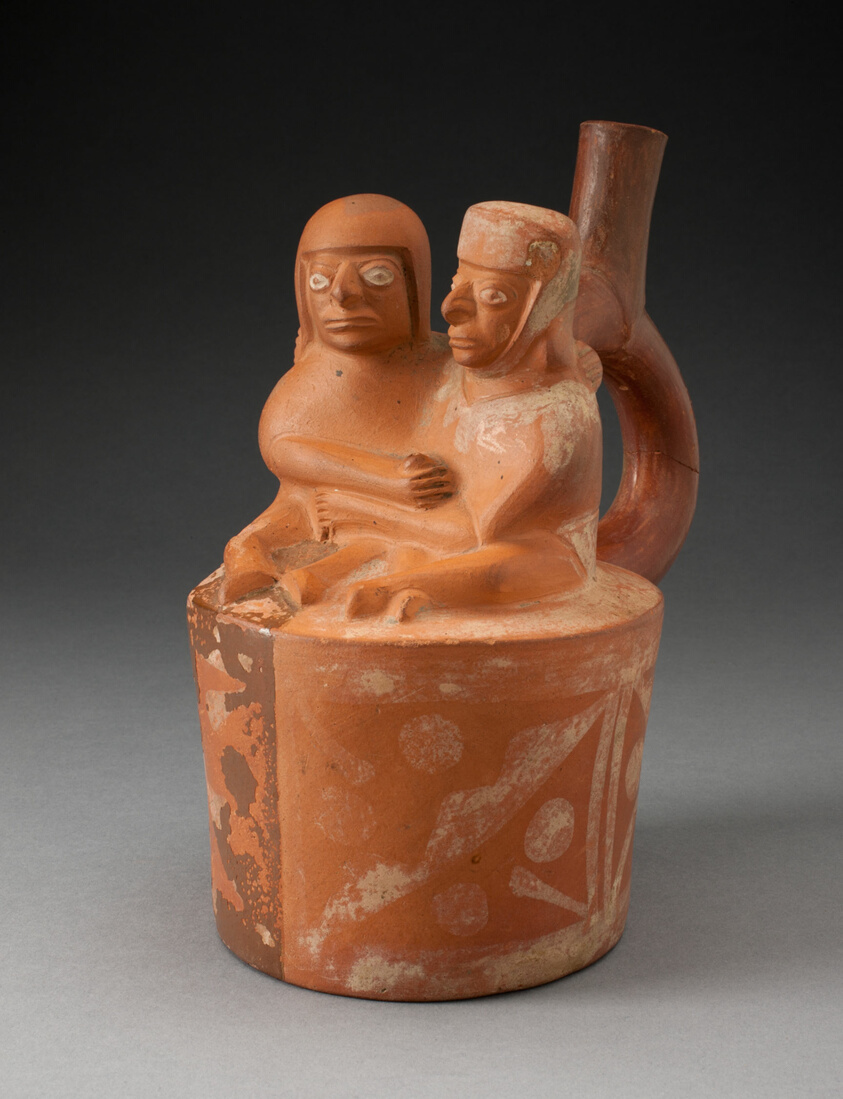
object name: Vessel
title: Handle Spout Vessel Depicting a Couple in an Erotic Embrace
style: moche, mochica, early intermediate period, Pre-Columbian, americas, Arts of the Americas, andean, andes, south american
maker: Moche (North coast, Peru)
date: 100 BCE–500 CE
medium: Ceramic and pigment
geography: Peruvian North Coast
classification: earthenware; ceramics; vessel; art of the americas